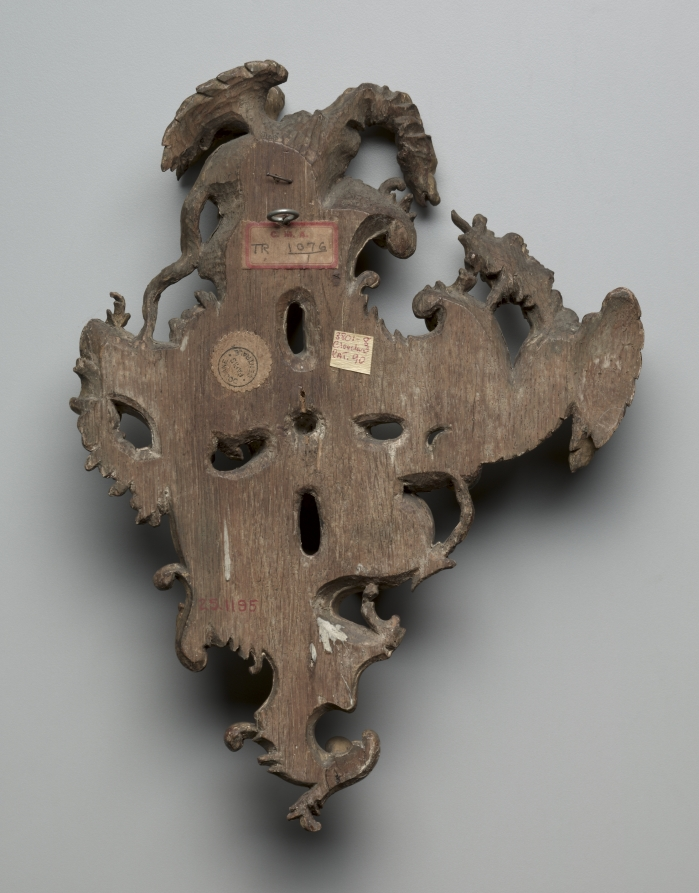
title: Wall Decoration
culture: France, Regency Period, 18th Century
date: 1715–1725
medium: wood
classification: Furniture and woodwork